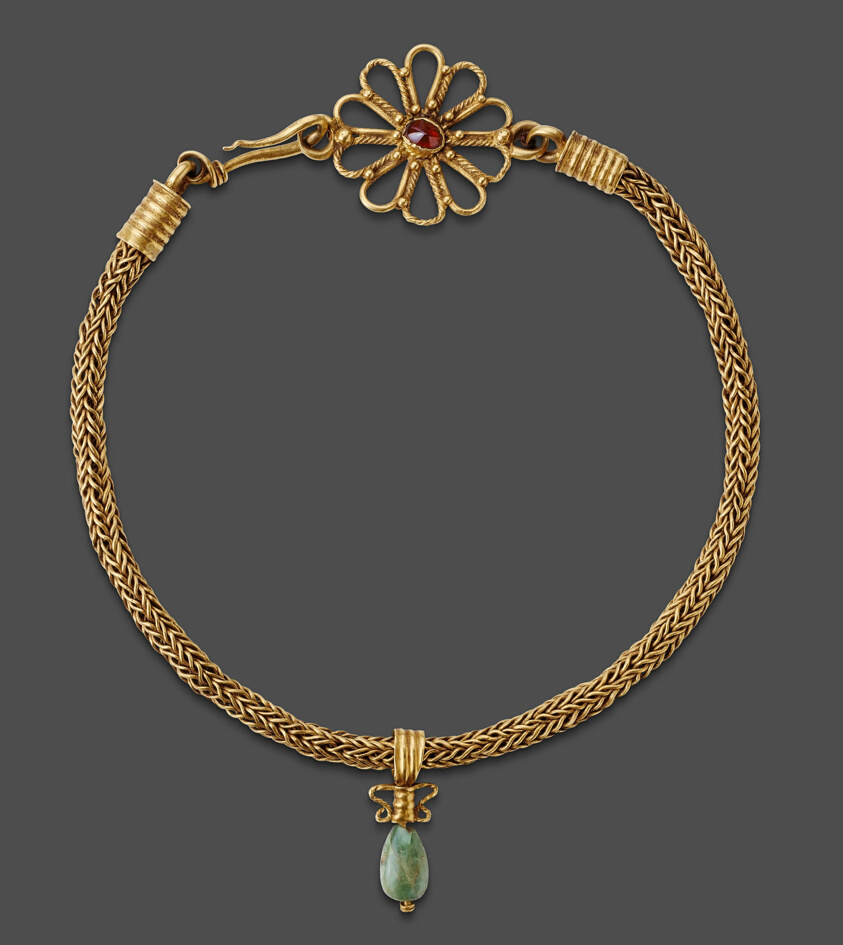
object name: Costume and Accessories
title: Necklace with Pendant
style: roman period (egyptian), ancient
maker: Roman; probably Egypt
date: 2nd-3rd century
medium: Gold, garnet, and emerald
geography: Roman Empire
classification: pendant (jewelry); gold; metal; jewelry; ancient art; costume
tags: beauty, rituals